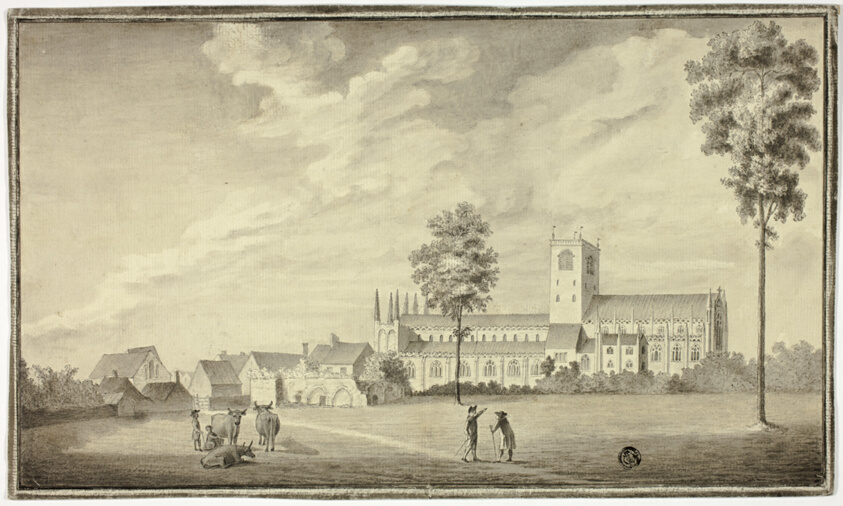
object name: Drawing and Watercolor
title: Old Abbey Church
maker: Follower of Samuel Hieronymus Grimm (Swiss, 1733-1794); or possibly Ralph Bullock (English, 1867-1949)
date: 18th century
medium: Pen and black ink, with brush and gray wash and touches of scraping, on ivory laid paper, laid down on grayish-ivory laid paper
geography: Switzerland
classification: ink or chalk wash; drawings (visual works); prints and drawing